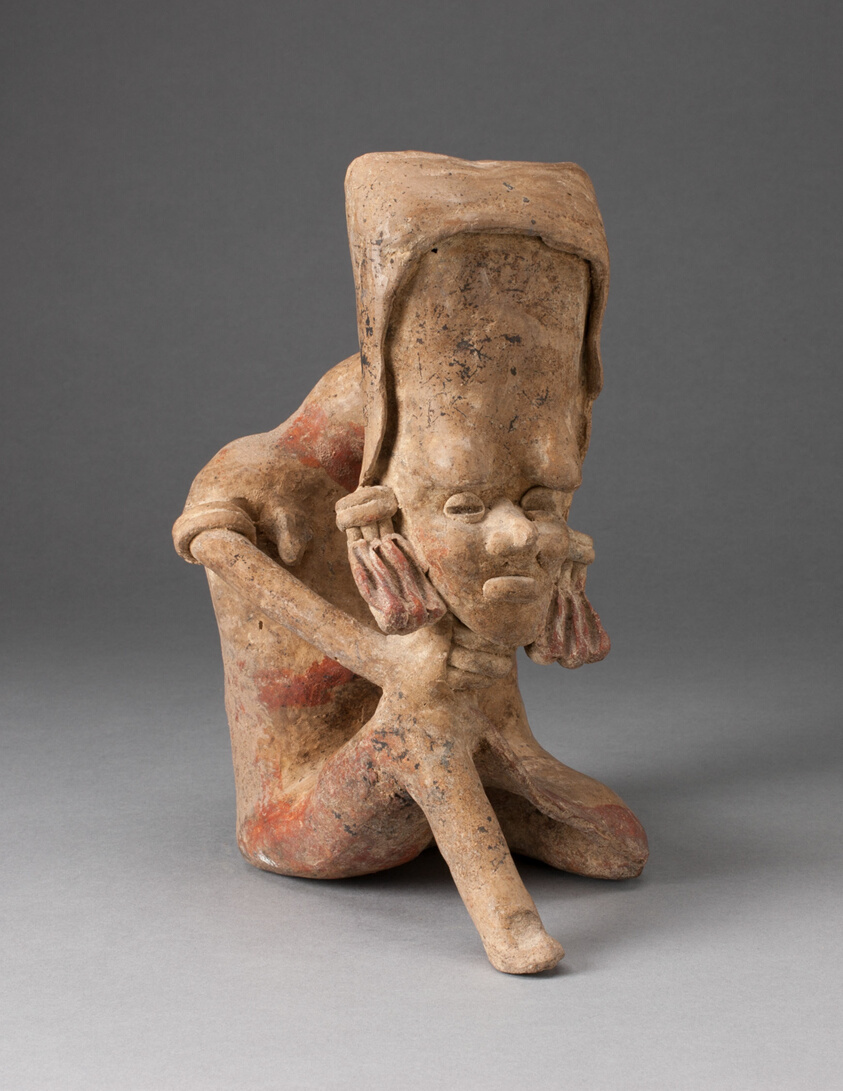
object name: Sculpture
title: Seated Figure with an Elongated Head and Chin Placed on Knee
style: jalisco, ameca-zacoalco, mesoamerican, Pre-Columbian, americas, Arts of the Americas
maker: Jalisco, Ameca style; Ameca Valley, Jalisco, Mexico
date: 300 BCE–300 CE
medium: Ceramic and pigment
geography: Jalisco state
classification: earthenware; art of the americas; ceramics; sculpture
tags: people